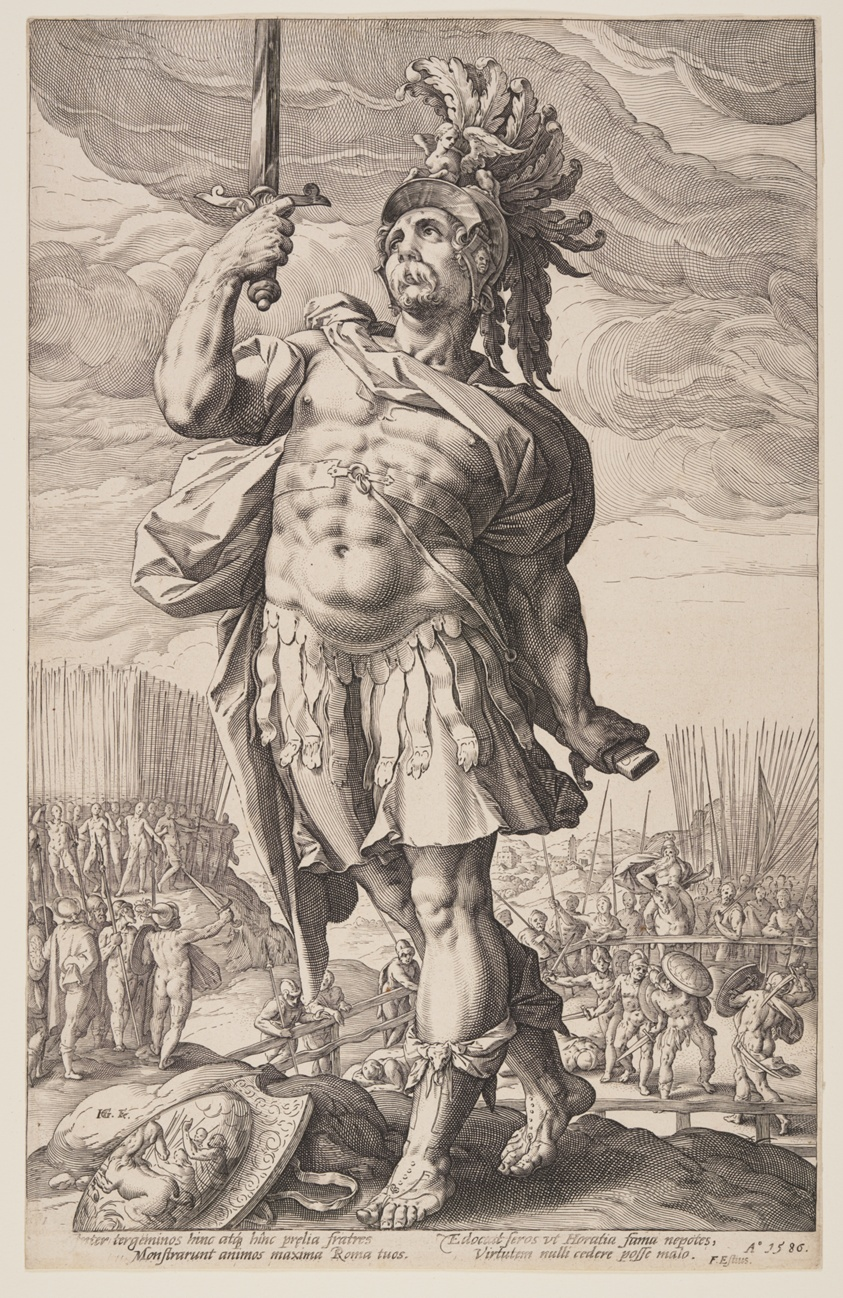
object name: Print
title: Publius Horatius, from The Roman Heroes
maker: Hendrick Goltzius (Dutch, 1558–1617)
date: 1586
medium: Engraving on ivory laid paper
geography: Netherlands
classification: print; paper; prints and drawing; engraving